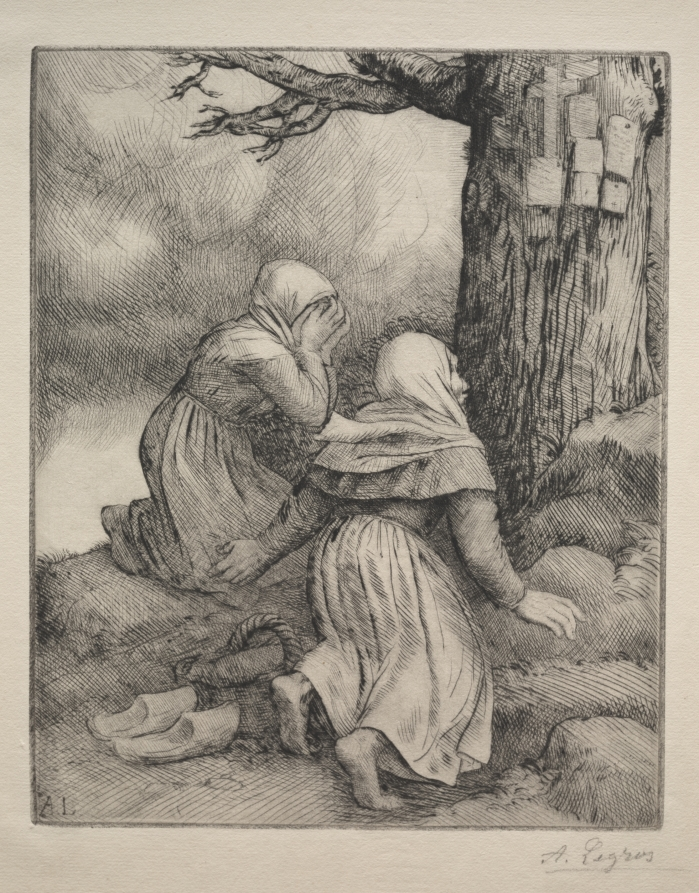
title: Bowing before the Tree (L'arbre de salut)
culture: France, 19th-20th century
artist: Alphonse Legros (French, 1837–1911)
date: c. 1857–1911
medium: etching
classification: Print